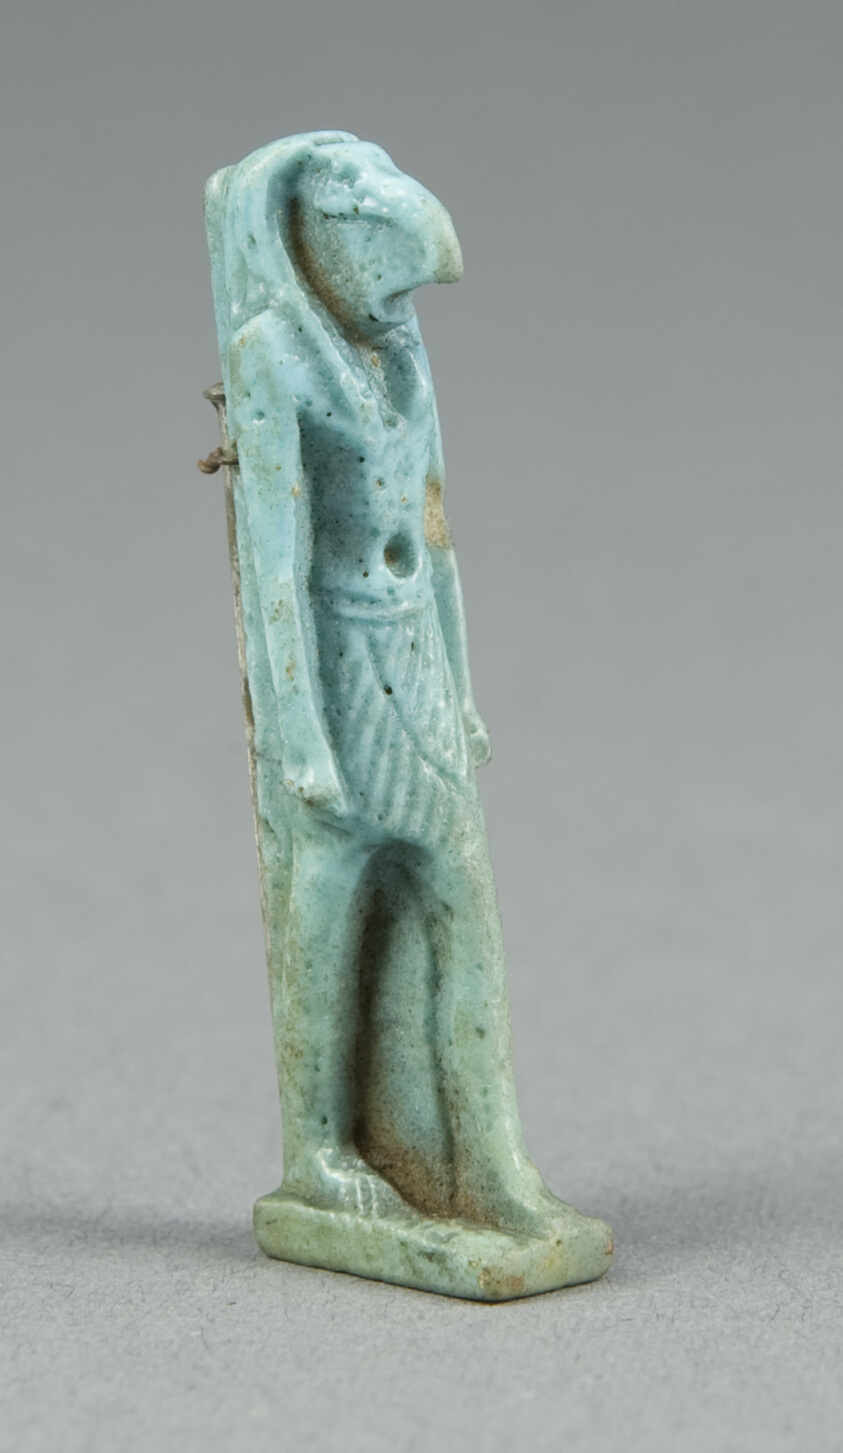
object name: Costume and Accessories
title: Amulet of the God Thoth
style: third intermediate period, egyptian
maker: Egyptian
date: Third Intermediate Period, Dynasty 21–25 (1070–656 BCE)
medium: Faience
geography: Egypt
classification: amulet; jewelry; ceramics; ancient art; costume; faïence (composite material)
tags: gods (deities)